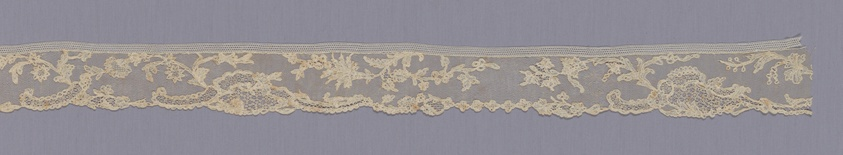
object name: Textile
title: Border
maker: France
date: 1750s/60s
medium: Linen, needle lace of a type known as "Point d'Alençon"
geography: France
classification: textile; lace - needle; lace